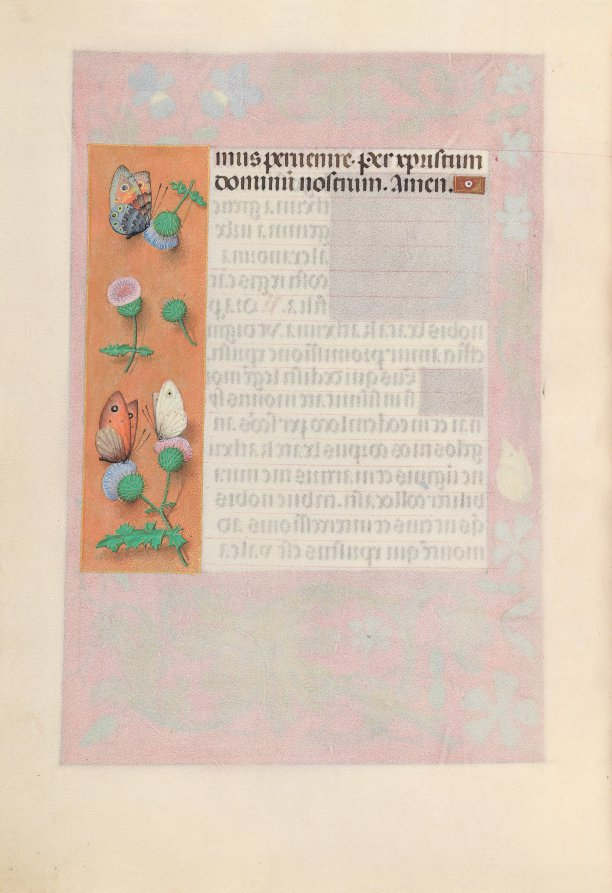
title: Hours of Queen Isabella the Catholic, Queen of Spain: Fol. 190v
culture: Flanders, Ghent and Bruges, late 15th century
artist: Master of the First Prayerbook of Maximillian (Flemish, c. 1444–1519)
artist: and Associates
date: c. 1500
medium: ink, tempera, and gold on vellum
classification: Bound Volume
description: This manuscript was illuminated by a circle of at least five highly organized manuscript painters active in the Flemish cities of Ghent and Bruges. The principal illuminator was Alexander Bening, who painted the majority of the book's miniatures. Manuscripts produced by this circle of artists are renowned for the decoration of their borders, which typically feature a rich variety of realistically-painted flowers, birds, and butterflies. This prayer book, called a book of hours, was intended not for a cleric, but for the private devotions of a lay person-in this case, Isabella the Catholic, Queen of Spain (1451-1504). Isabella's coat of arms embellishes the book's frontispiece. It is unlikely that the book was commissioned by the Queen herself; rather, she probably received it as a diplomatic gift from someone courting her patronage, perhaps Cardinal Francisco Jimenez de Cisneros. A Franciscan friar, Jimenez was dependent upon Isabella for his advancement, first to the post of Queen's confessor in 1492, and then to Archbishop of Toledo in 1495.